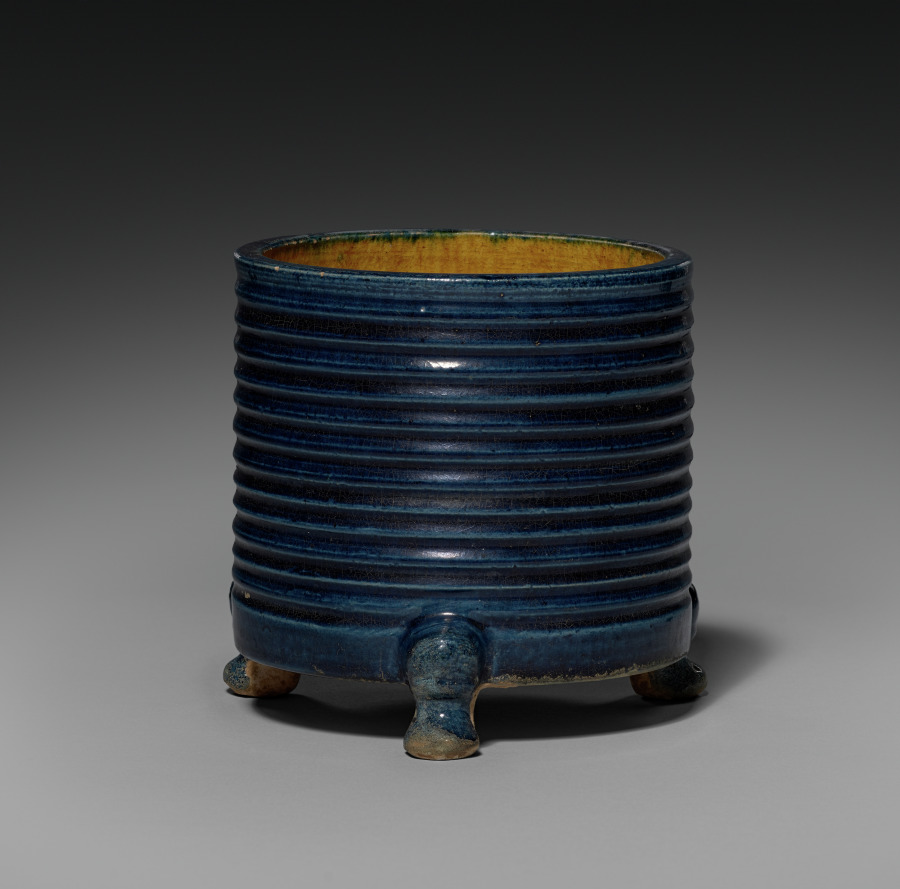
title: Covered Jar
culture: China, Tang dynasty (618-907)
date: early 700s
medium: glazed earthenware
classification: Ceramic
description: This covered cylindrical jar with three animal feet is lavishly covered with a cobalt blue glaze in the exterior and an amber glaze in the interior. Of the colored lead glazes of sancai (three-color) ware, blue was preeminent and precious. Imported cobalt from Persia (Iran, Afghanistan) was used as a glaze colorant that yields a rich, brilliant blue of considerable splendor.